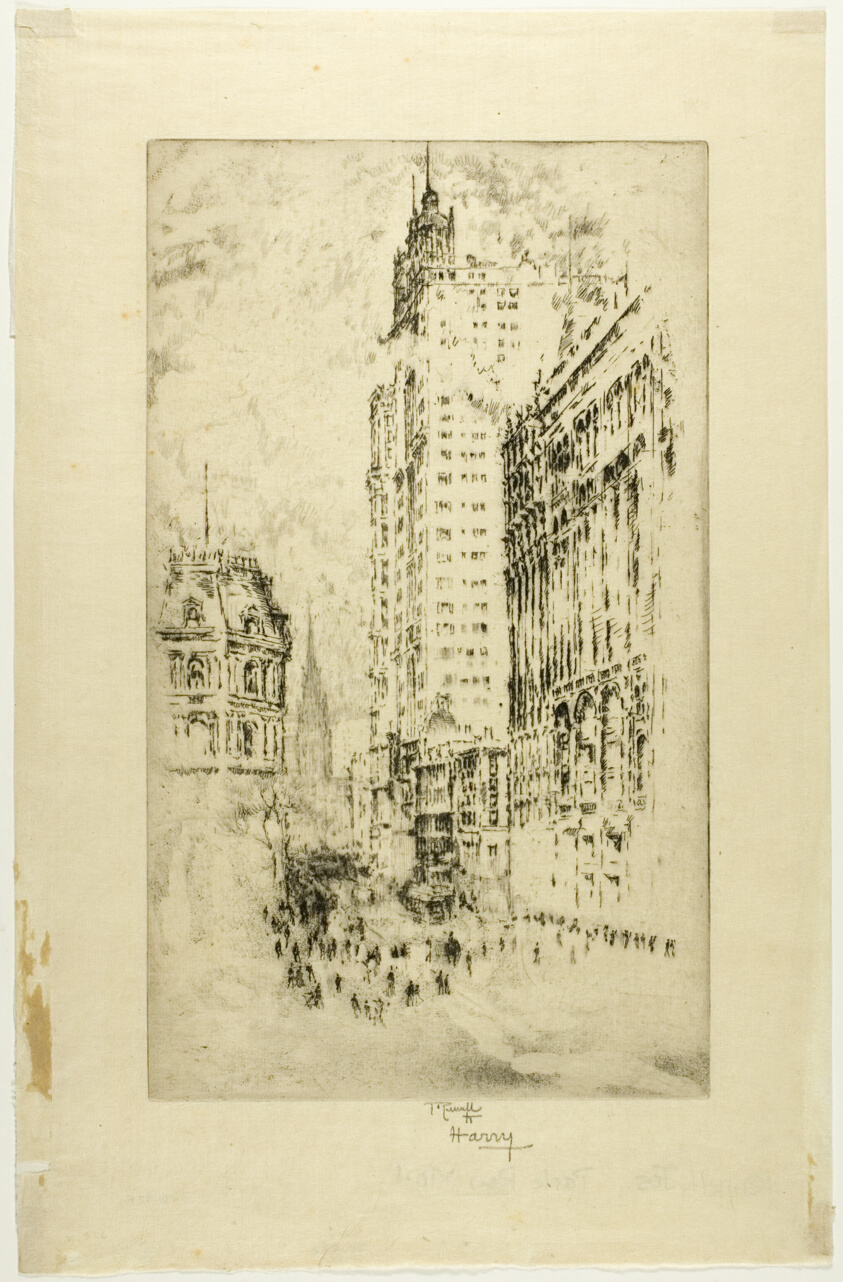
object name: Print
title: Park Row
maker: Joseph Pennell (American, 1857-1926)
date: 1904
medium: Etching on ivory laid paper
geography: United States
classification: etching; print; prints and drawing